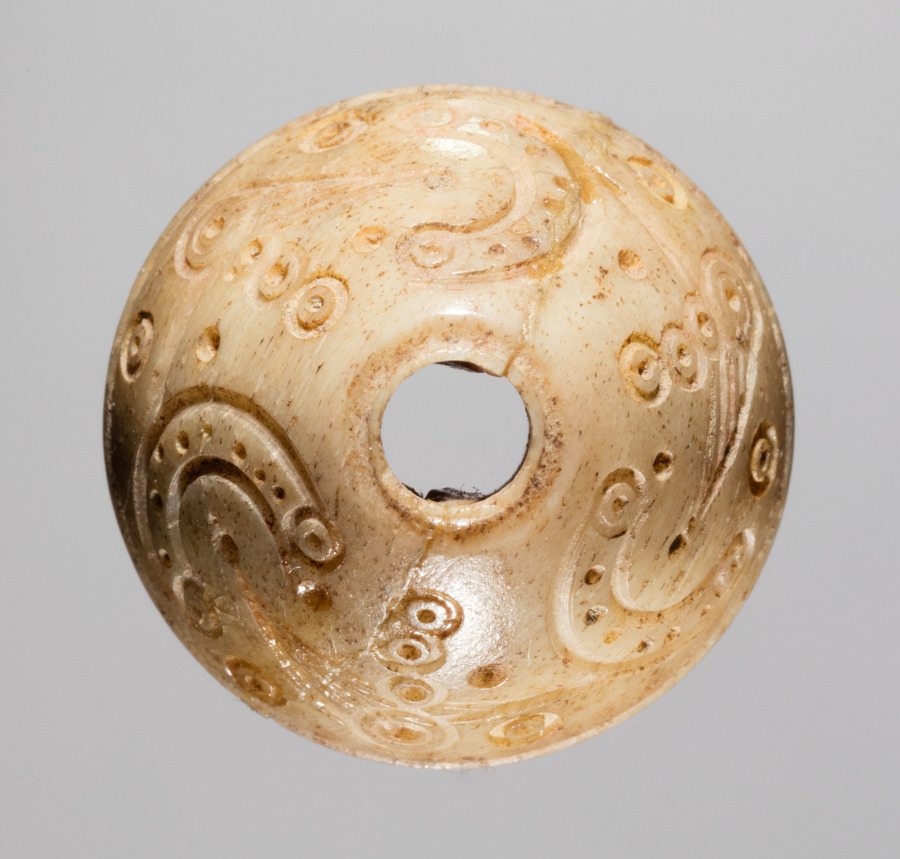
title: Spindle Whorl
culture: Iran, early Islamic period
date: 700s - 900s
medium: bone, incised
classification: Spindle Whorl